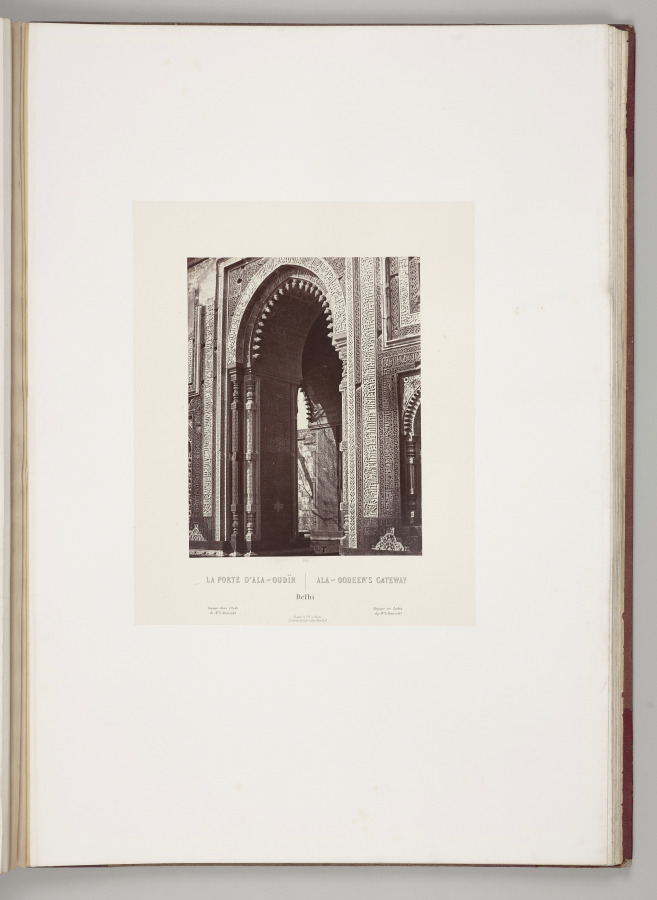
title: Ala-Oodeen's Gateway, Delhi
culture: France, 19th century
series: India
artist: Louis-Théophile Marie Rousselet (French, 1845–1929)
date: 1865–68, published 1869–70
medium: Albumen print from glass plate negative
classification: Photograph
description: Concerned that his drawings did not do justice to the splendor of India’s monuments, Rousselet learned photography in India that year, a remarkable accomplishment. He proved to be a talented photographer with a sophisticated sense of composition. The scenes in this volume sweep across sites of Sultanate, Rajput, and Mughal power in northern India, from the sacred Hindu city of Varanasi on the Ganges River to Alwar in Rajasthan. Also included are several scenes of industry and portraits of Indian rulers.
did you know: Louis Rousselet described himself as a “scientific traveler” when he went to India alone at age 18 in 1863 and stayed into 1868.